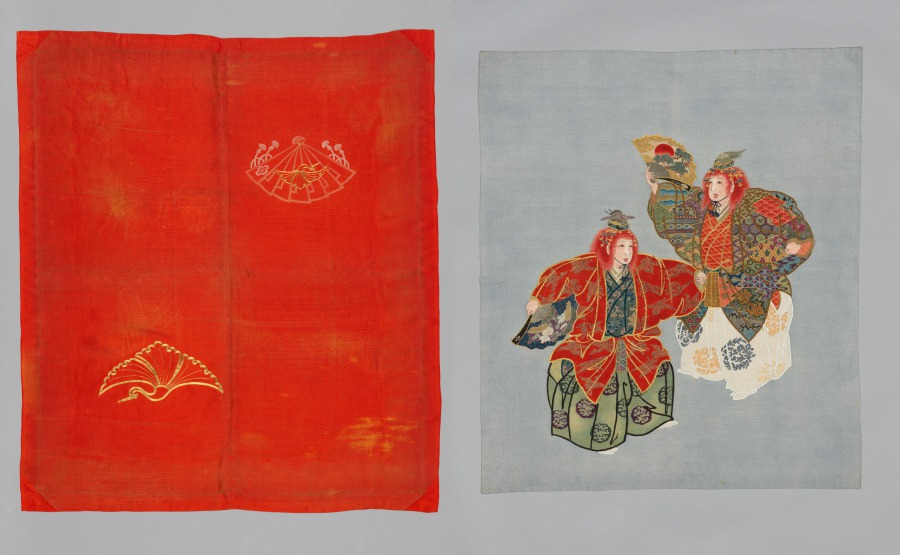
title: Embroidered and Resist-Dyed Fabric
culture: Japan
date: late 1800s-early 1900s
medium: embroidered silk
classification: Embroidery